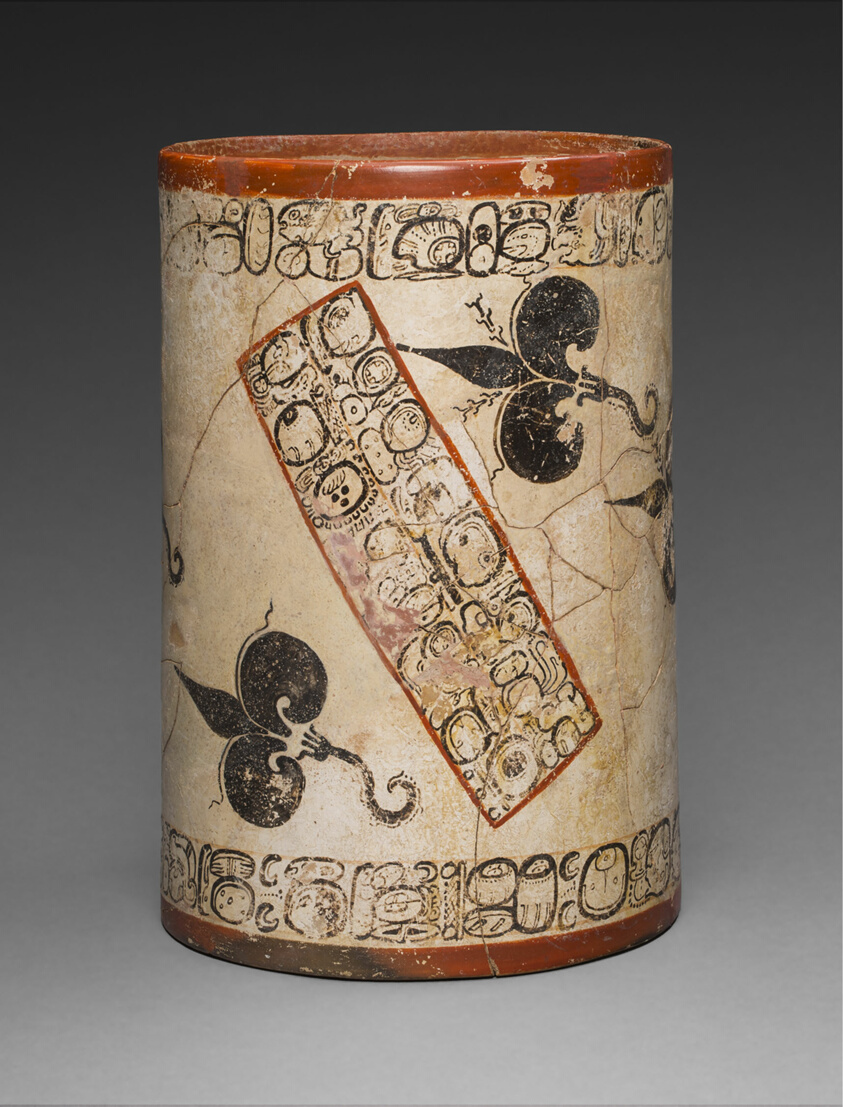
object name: Vessel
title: Water-Lily Vessel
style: maya, classic, mesoamerican, Pre-Columbian, americas, mayan, late classic, Arts of the Americas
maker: Ah Maxam; Maya, active mid-/late 8th century; Vicinity of Naranjo, Petén region, Guatemala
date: 750–800 CE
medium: Ceramic and pigment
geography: Petén department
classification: ceramics; earthenware; vessel; art of the americas; vessel for serving drinks; inscription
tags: waterlilly, artists, flowers, geneology, parents, underworld, underwater